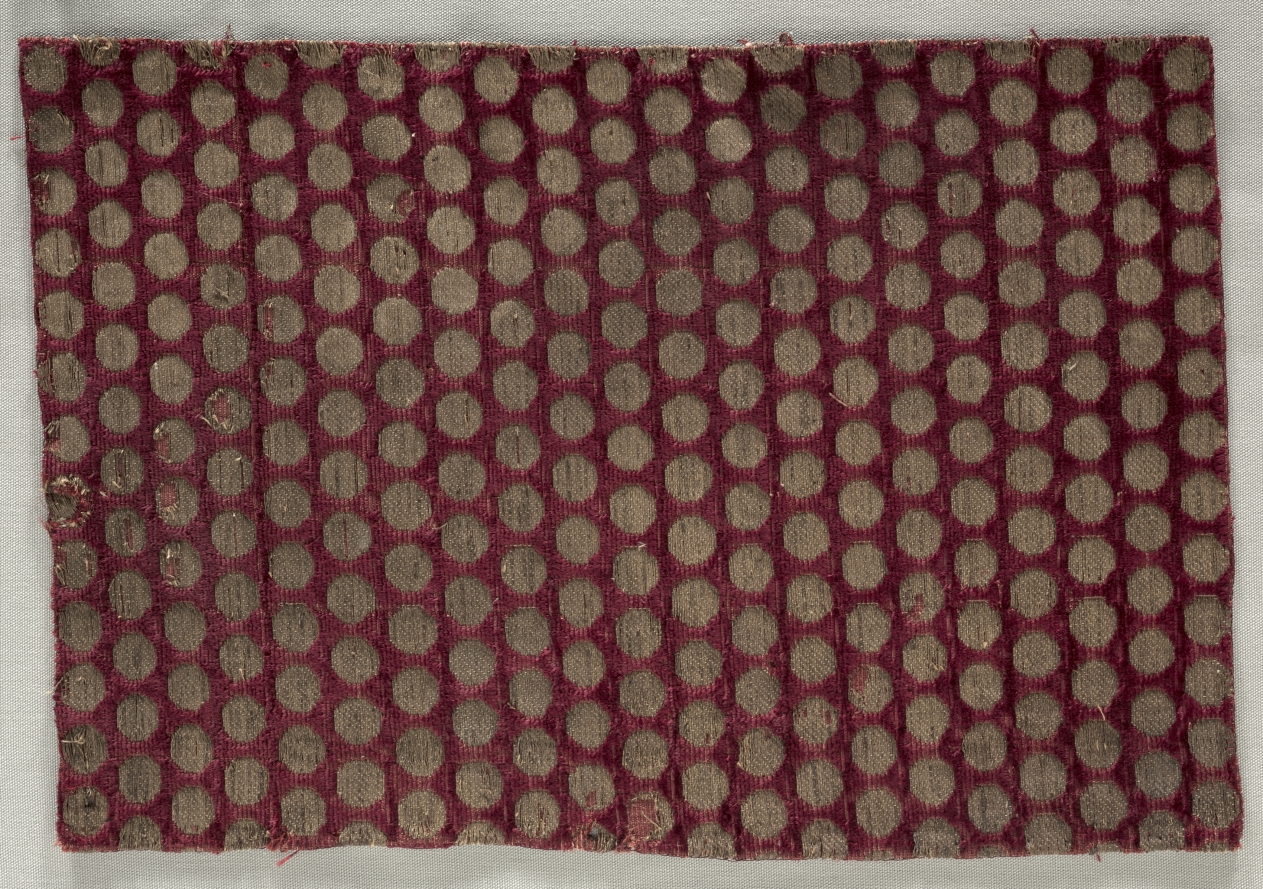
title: Velvet with gold discs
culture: Iran, probably Tabriz, Ilkhanid period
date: late 1200s or earlier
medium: silk, gilt-metal thread; brocaded velvet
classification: Velvet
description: Silk velvet with rich pile is one of the most opulent and prestigious fabrics, especially when embellished with gold thread. This is one of the earliest known velvets. A 1295 inventory of Pope Boniface VIII includes "a piece of red Tartar velvet with gold discs," which probably refers to this velvet pattern. It is attributed to Iran, possibly in Tabriz where Italian agents resided and could have provided the transfer of silk-velvet technology to Italy. Although the origin of velvet is uncertain, silk velvet with an extra silk pile warp was probably developed in a silk weaving country such as Iran. Inventive Iranian weavers may have developed it during the 1200s or earlier; they are acclaimed for producing the most colorful velvets ever during the 1500s and 1600s.